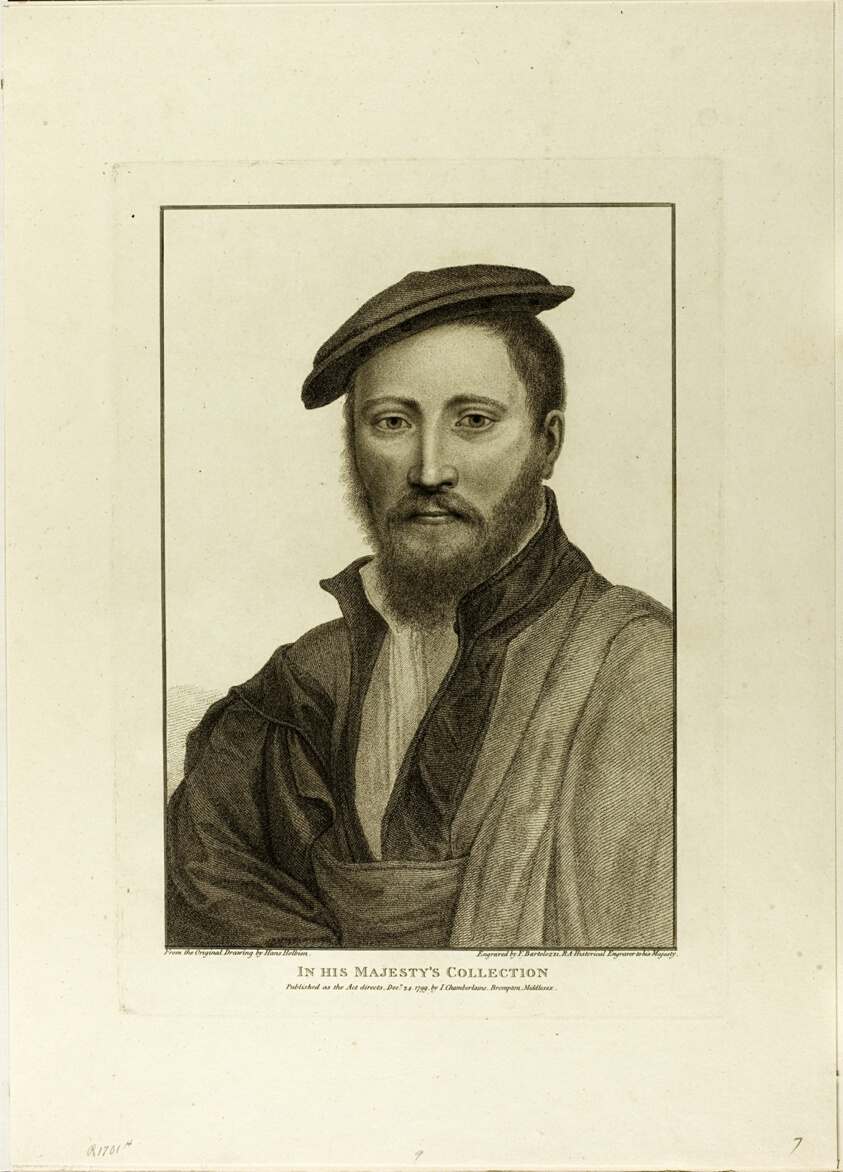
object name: Print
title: Portrait of a Man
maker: Francesco Bartolozzi (Italian, 1727-1815); after Hans Holbein the younger (German, 1497-1543)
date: December 24, 1799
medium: Stipple engraving on cream wove paper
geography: Italy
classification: engraving; print; prints and drawing